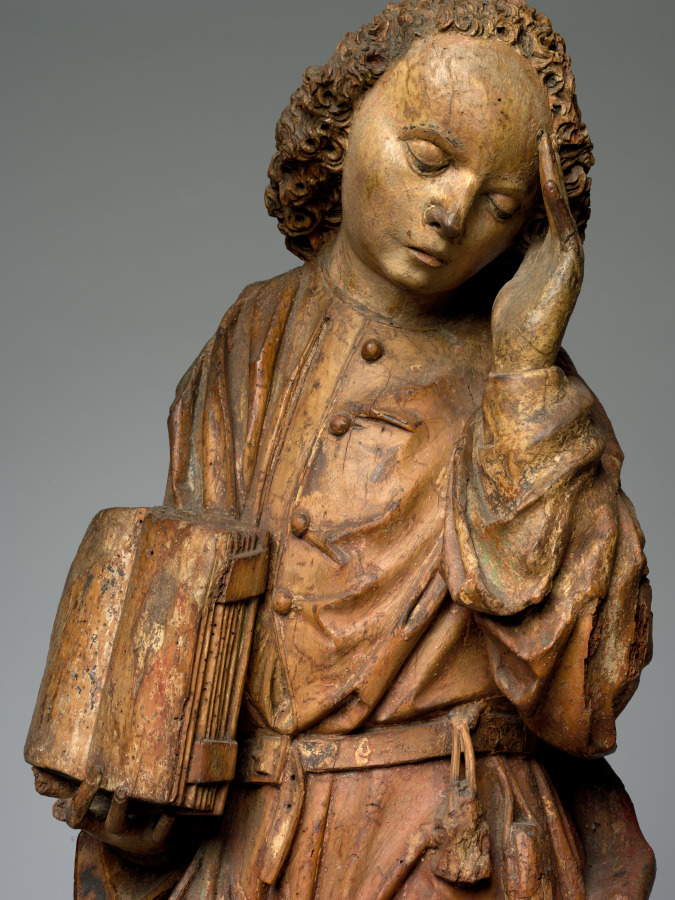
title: Saint John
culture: France, 15th century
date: 1450–1499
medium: wood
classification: Sculpture